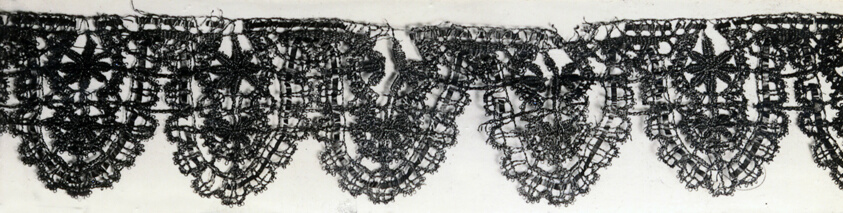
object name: Textile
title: Border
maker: Italy, probably Genoa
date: 1625/50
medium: Gold-gilt-silver-and-copper-metal strip and gold-gilt-silver-and copper-metal-strip-wrapped silk, bobbin straight lace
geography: Italy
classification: textile; lace - bobbin